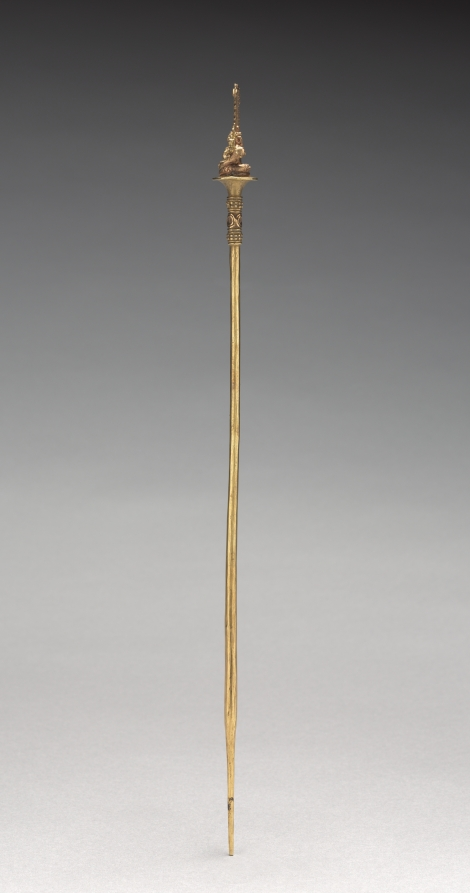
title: Lime Dipper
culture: Colombia, Calima region, Yotoco style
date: c. 1–800 CE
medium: gold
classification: Metalwork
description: Coca-leaf chewing was a widespread ritual in ancient South America. Utensils included a container and a dipper or spoon for powdered lime (made from seashells), added to the coca to enhance its gentle, stimulating effect. Colombian cultures are especially known for transforming these utensils into works of art made of precious metal. The image on the tallest dipper is wonderfully complex. A serpent coils at the bottom, beneath a snarling animal with a huge, vertical tail. This animal has a tiny monkey on its back; the monkey also has a huge tail, which rests on the first animal's head like a headdress. This intricate image was created with the lost-wax casting process.